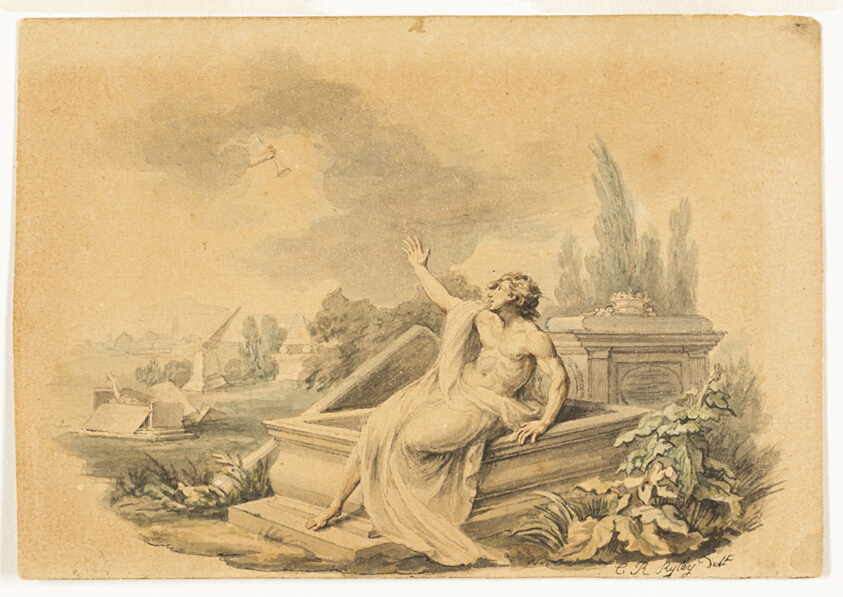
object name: Drawing and Watercolor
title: Each Moment Has Its Sickle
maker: Charles Reuben Ryley (English, c. 1752-1798)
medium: Watercolor on tan wove paper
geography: England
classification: watercolor; drawings (visual works); prints and drawing